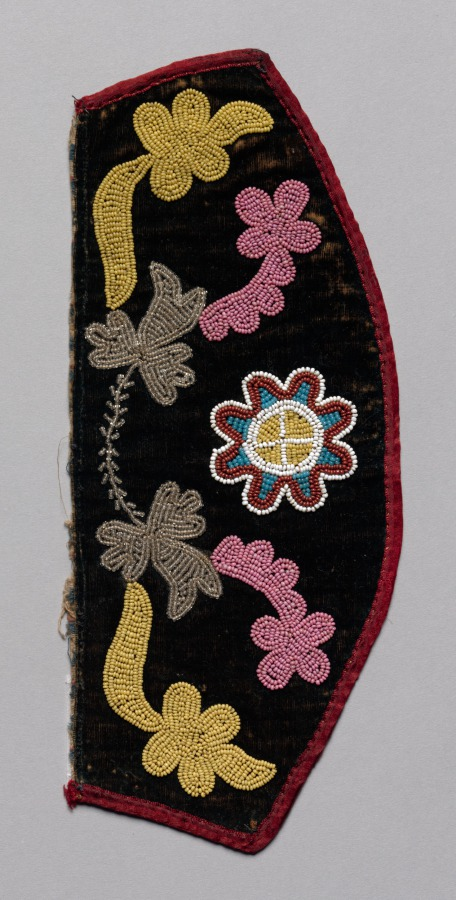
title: Cuff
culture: Northeast Woodlands, Great Lakes Region, Anishinaabe (Ojibwe) or Nehiyawak (Cree) People?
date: late 1800s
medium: Velvet, satin, glass beads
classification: Garment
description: In the 1800s, native peoples began to use European fabrics to fashion fine formal garments; they favored sturdy cloth, such as velvet and wool broadcloth, which provided support for heavy decorative beadwork that was added by hand. Often the fabric was a dark color, providing dramatic contrast for the multicolored beads. Rather than encrusting the entire garment, beadwork was confined to cuffs, “epaulettes,” bib-like plackets and yokes, rectangular panels sewn to leggings, shirts, and dresses, and the like.